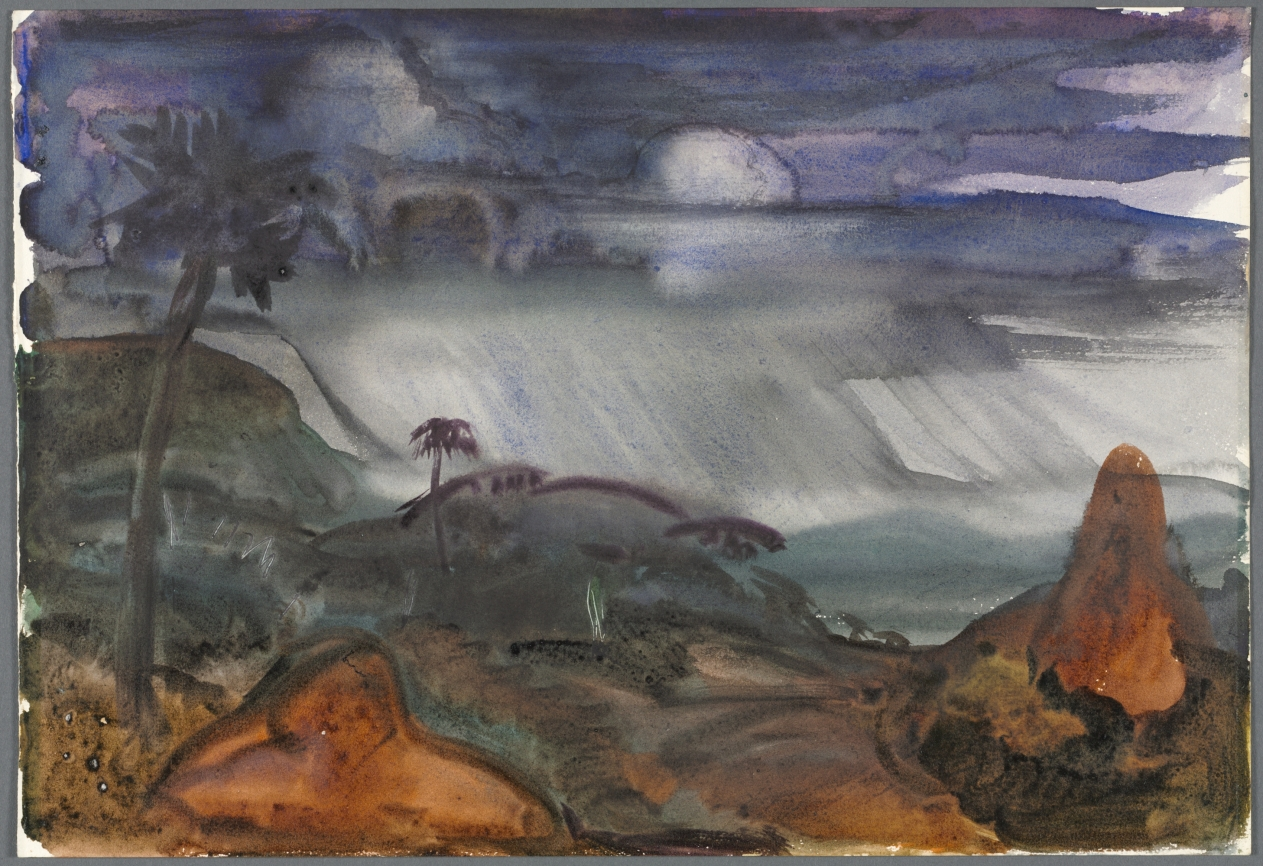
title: Rain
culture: America, Ohio, Cleveland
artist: Paul B. Travis (American, 1891–1975)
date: 1928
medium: watercolor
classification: Drawing